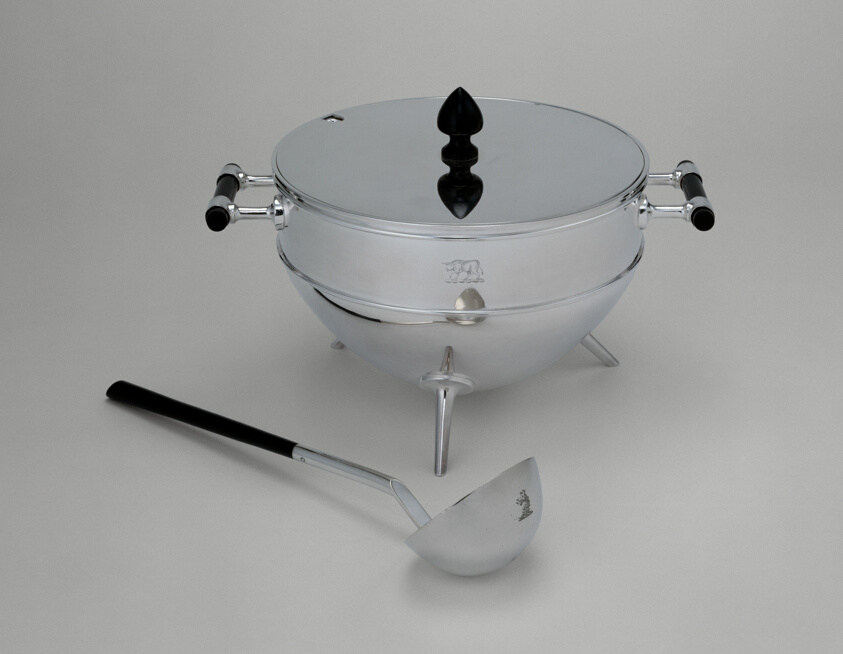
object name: Metalwork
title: Ladle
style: Japanism, japonism, design reform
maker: Designed by Christopher Dresser (English, born Scotland, 1834-1904); Made by Hukin and Heath (London and Birmingham, England, 1855-1953)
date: c. 1880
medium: Electroplated silver and ebony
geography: Birmingham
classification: metalwork; silver; european decorative arts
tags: ladle